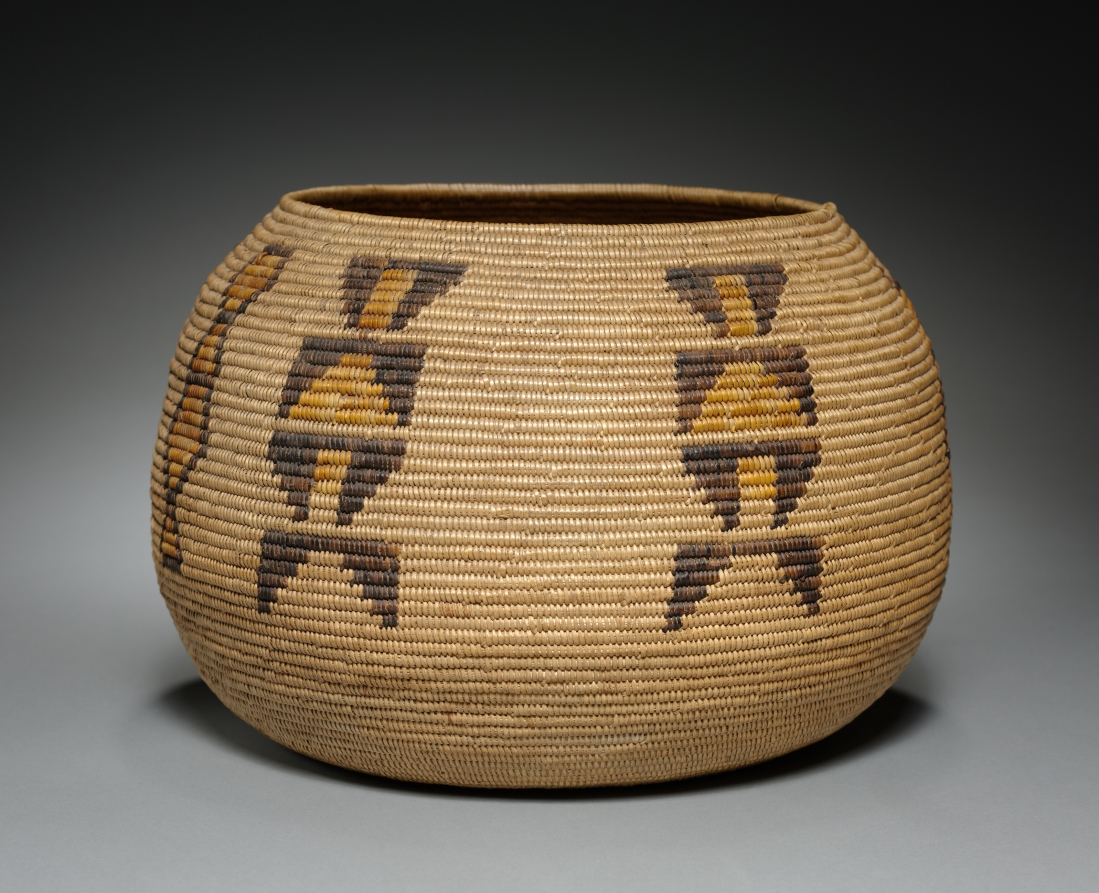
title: Gift Basket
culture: California, Cahuilla (Mission, Saboba Mission), Unassigned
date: c. 1900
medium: Juncus, sumac; coiled, deergrass bundle foundation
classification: Basketry